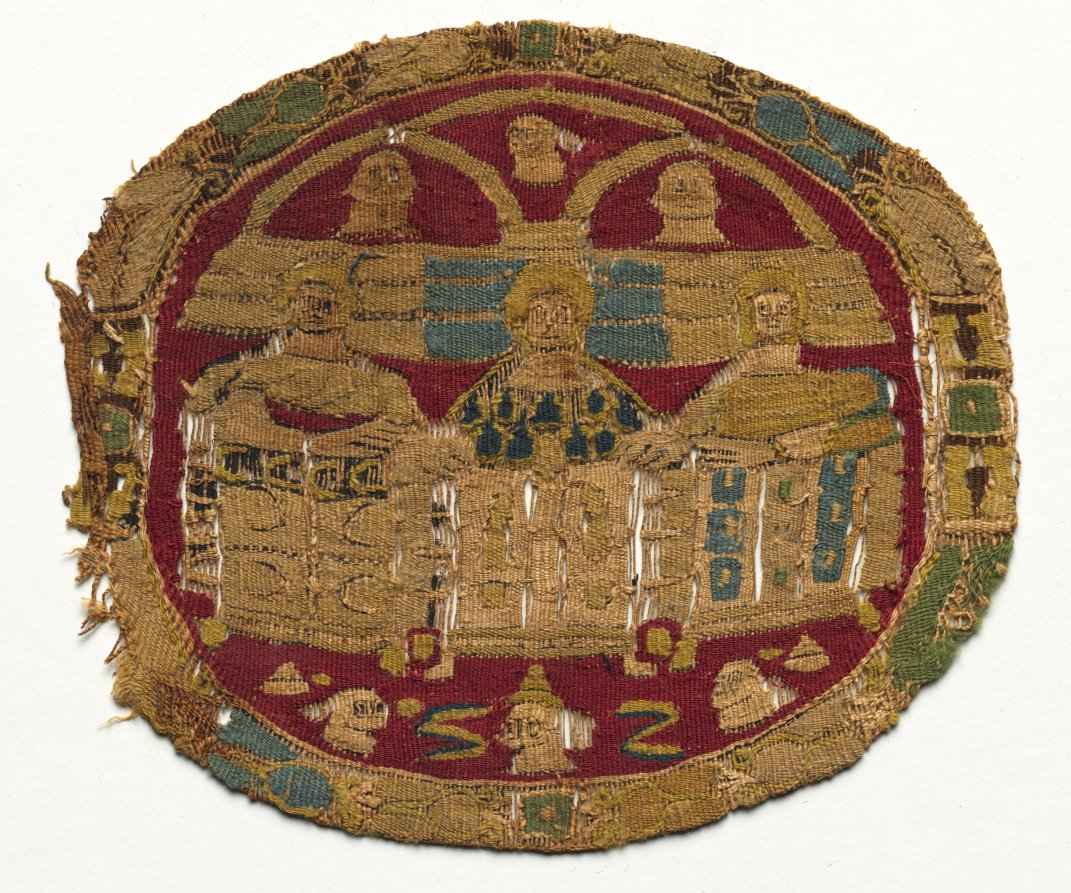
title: Segmenta (2 of 2)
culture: Egypt, Abbasid period (?), 8th - 9th century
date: 700s–800s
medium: tapestry; linen and wool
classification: Textile